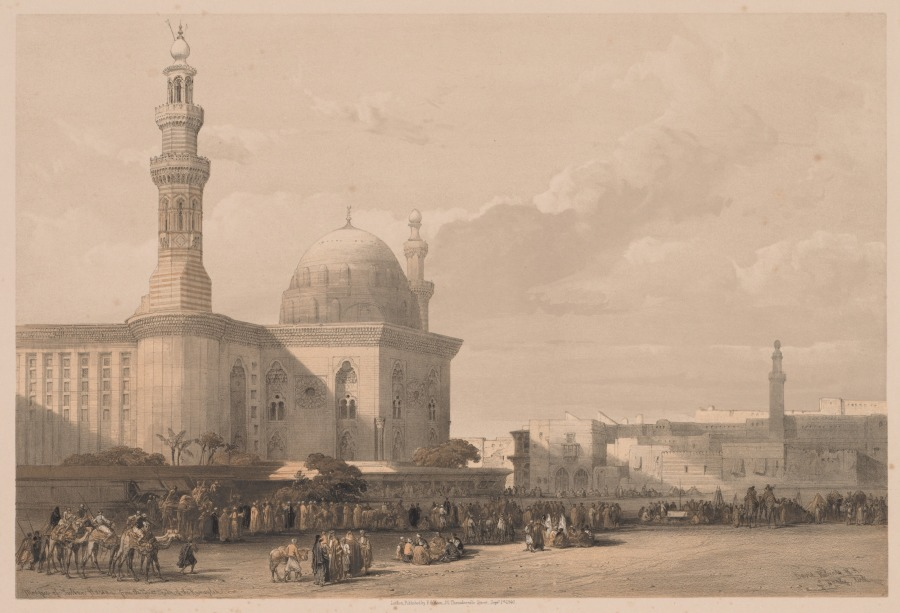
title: Egypt and Nubia: Volume III–No. 38, Mosque of Sultan Hassan from the Great Square of the Rameyleh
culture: England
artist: Louis Haghe (British, 1806–1885)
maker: after David Roberts (Scottish, 1796–1864)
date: 1838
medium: color lithograph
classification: Print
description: By the mid-1800s, the complexities of printing in numerous colors had been mastered, culminating in one of the high points of European printmaking. The plates drawn by Louis Haghe, which copy the watercolors that David Roberts made in Egypt, are examples of color lithography. Haghe, a Scottish topographical and architectural artist, spent a year traveling across this ancient land in 1838. The resulting prints––the first comprehensive series of views of the monuments, landscapes, and people of the Near East––were appreciated for their brilliant color and large scale.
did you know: Louis Haghe was appointed Lithographer to the Queen in 1838.